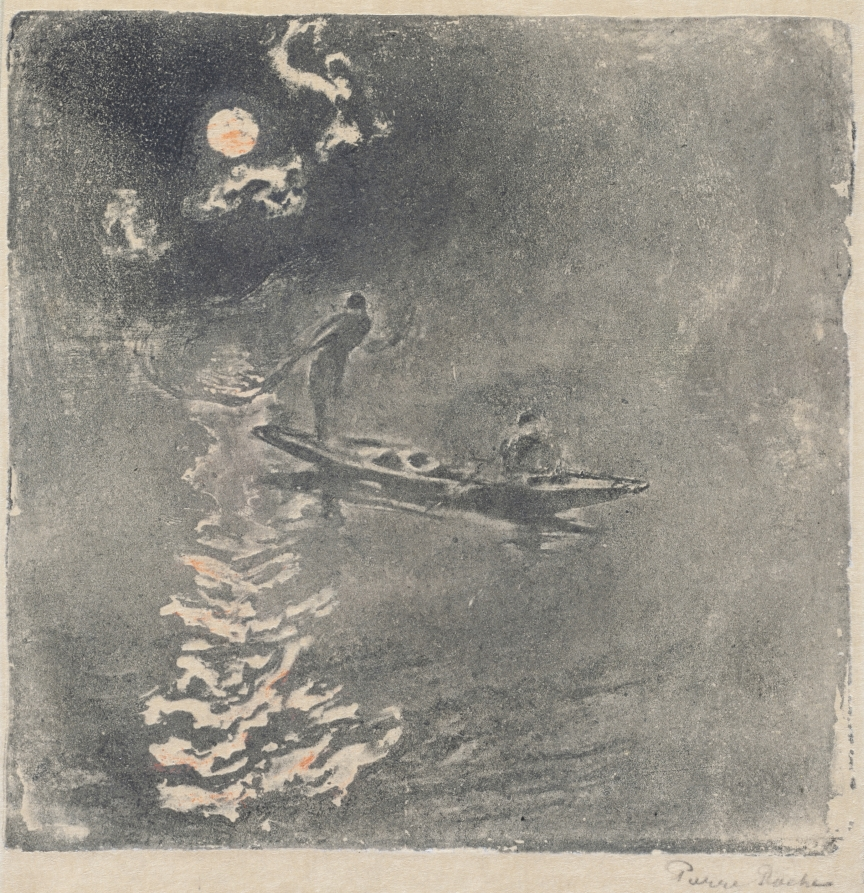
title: Night Fishing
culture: France, 20th century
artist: Pierre Roche (French, 1855–1922)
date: c. early 1900s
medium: gypsograph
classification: Print